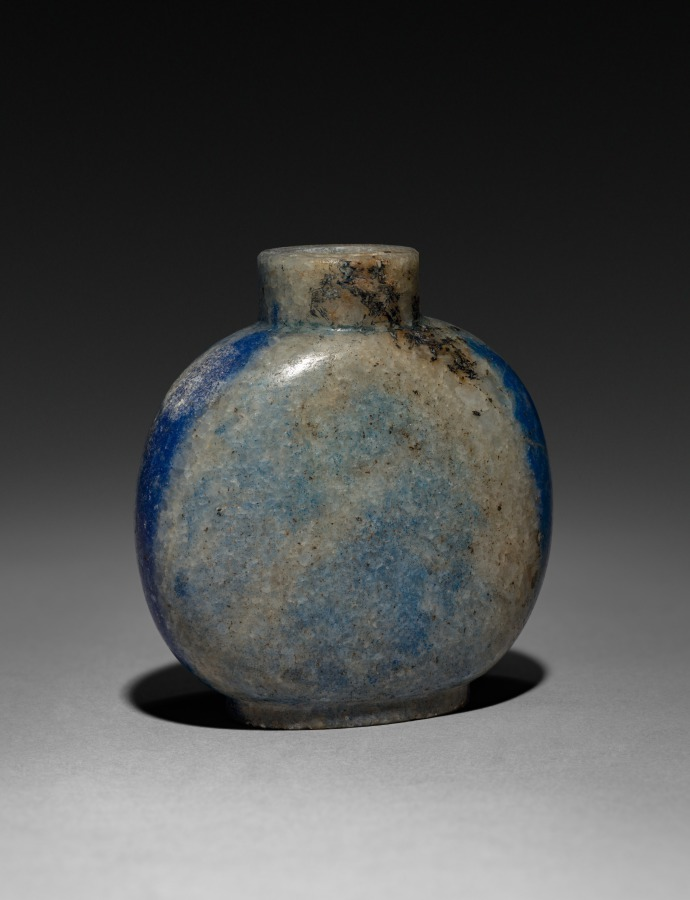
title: Snuff Bottle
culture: China, Qing dynasty (1644-1911)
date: 1644–1911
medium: glass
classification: Glass